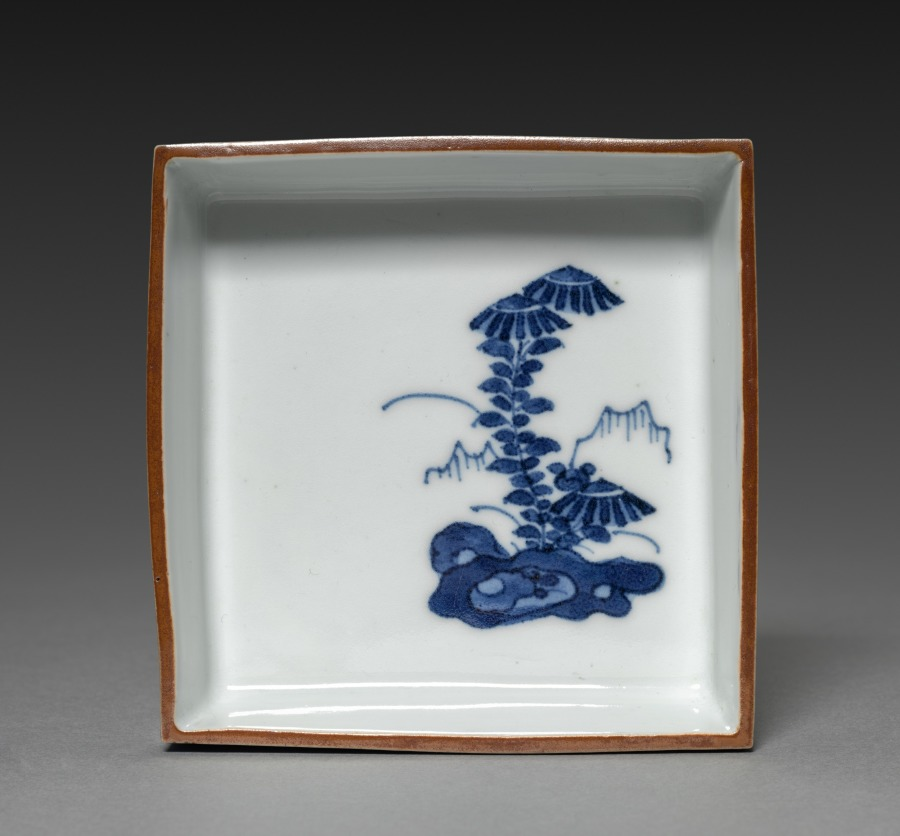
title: Side-Dish with Dandelion in Rocks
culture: Japan, Edo period (1615–1868)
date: 1700s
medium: One of a set of five dishes; porcelain with underglaze blue and overglaze iron oxide (Arita ware, Kutani style)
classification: Ceramic